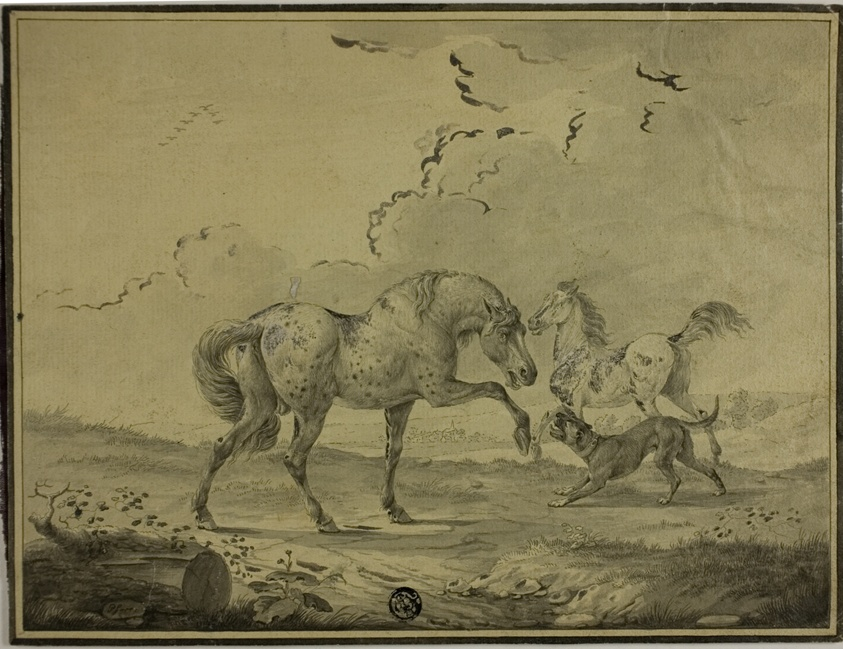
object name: Drawing and Watercolor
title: Two Horses Fighting Dog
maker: Johann Georg Pforr (German, 1745-1798)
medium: Pen and gray ink, with brush and gray and brown wash, heightened with lead white (discolored), on cream laid paper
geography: Germany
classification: ink or chalk wash; drawings (visual works); prints and drawing